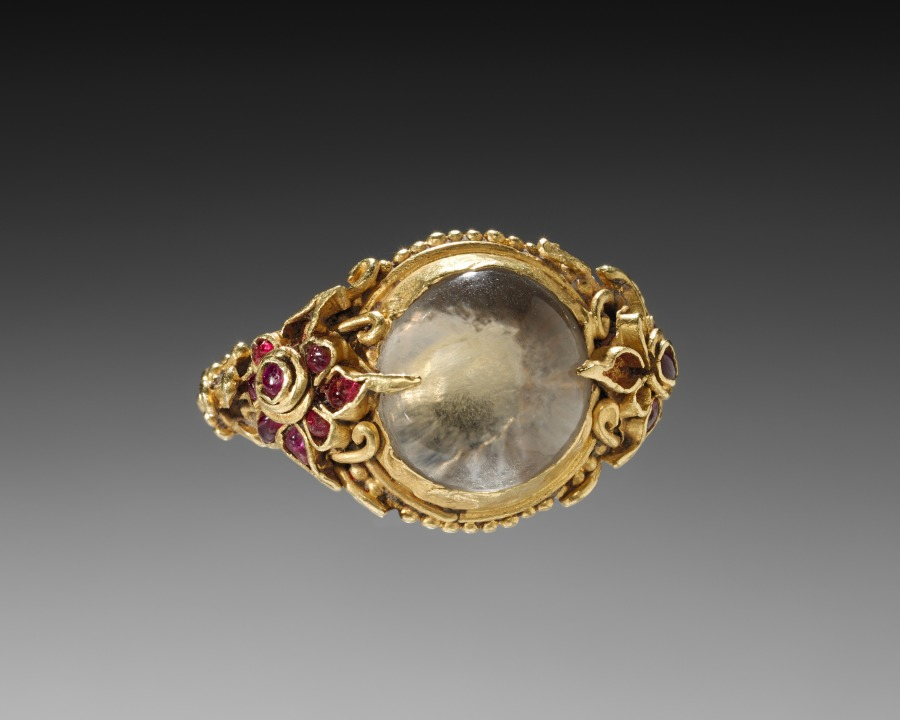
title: Ring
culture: Cambodia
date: 1800s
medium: gold with moonstone and rubies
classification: Jewelry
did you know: This gold ring features a large moonstone in a floral setting enlivened with rubies.